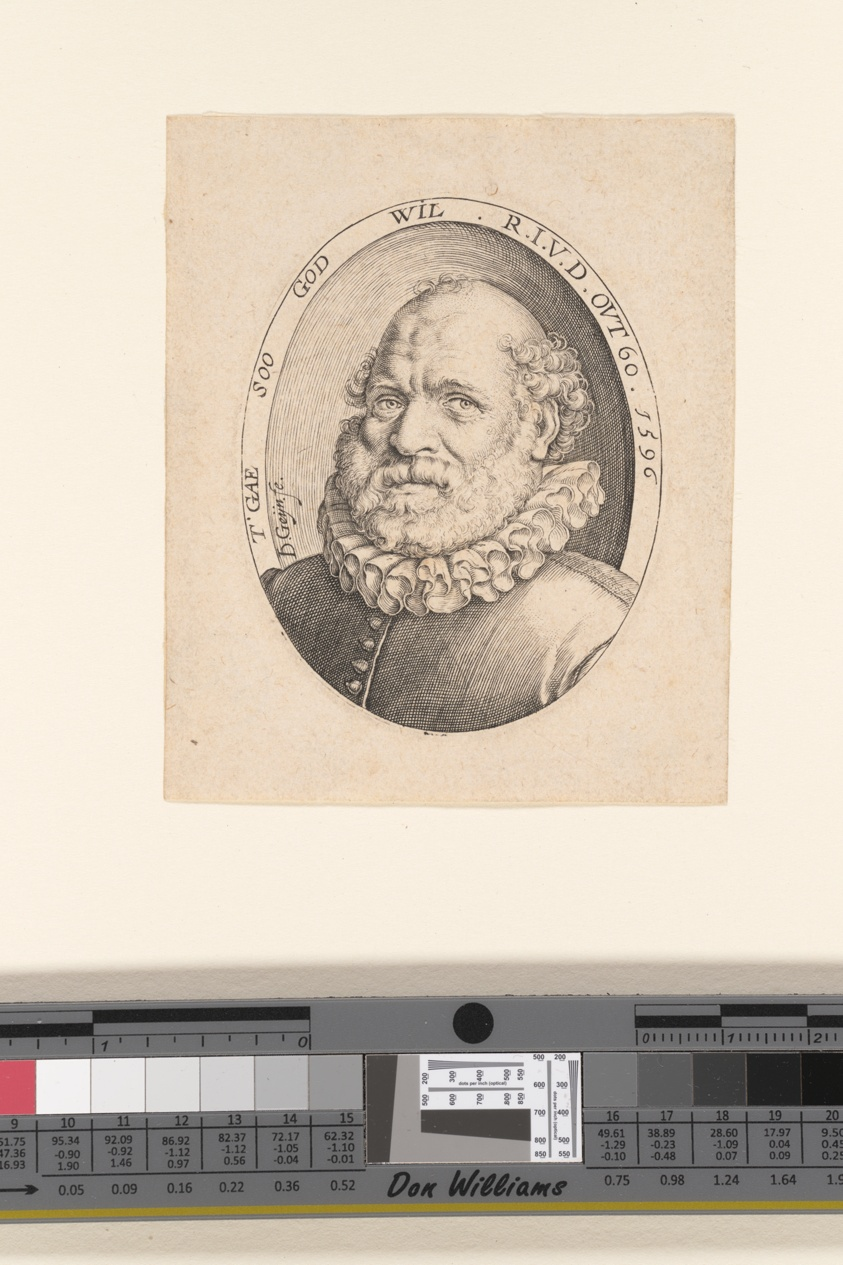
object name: Print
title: Rutgaert Janszoon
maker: Jacques de Gheyn II; Dutch, 1565–1629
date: 1596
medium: Engraving on paper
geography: Netherlands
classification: engraving; paper; print; prints and drawing